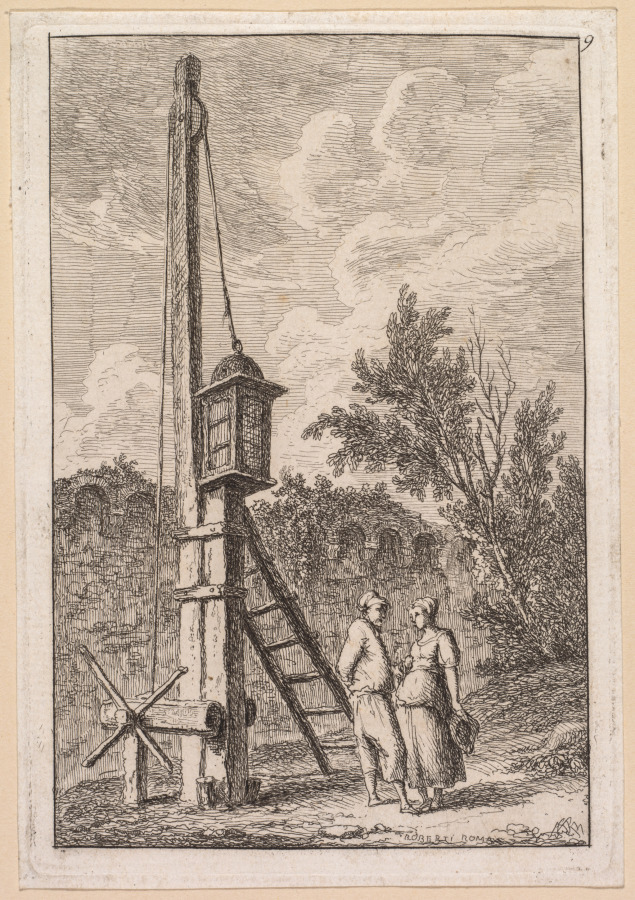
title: Le Poteau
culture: France, 18th century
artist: Hubert Robert (French, 1733–1808)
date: 1763–64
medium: etching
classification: Print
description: Derived from his own pen-and-ink drawings, this suite of etchings features fictional characters situated near recognizable buildings and statues in Rome. On the title page, Robert dedicated the suite to Marguerite Le Compte, who visited Rome in 1764 in the company of the wealthy author and art enthusiast Claude Henri Watelet. Both Le Compte and Watelet were amateur etchers, and they socialized with a group that included artists and printmakers centered at the academies in Italy. Robert’s dedication was likely motivated by the hope of future patronage from Le Compte. She may be the generous woman with a hand muff depicted in The Ancient Temple, the fifth scene in this series.